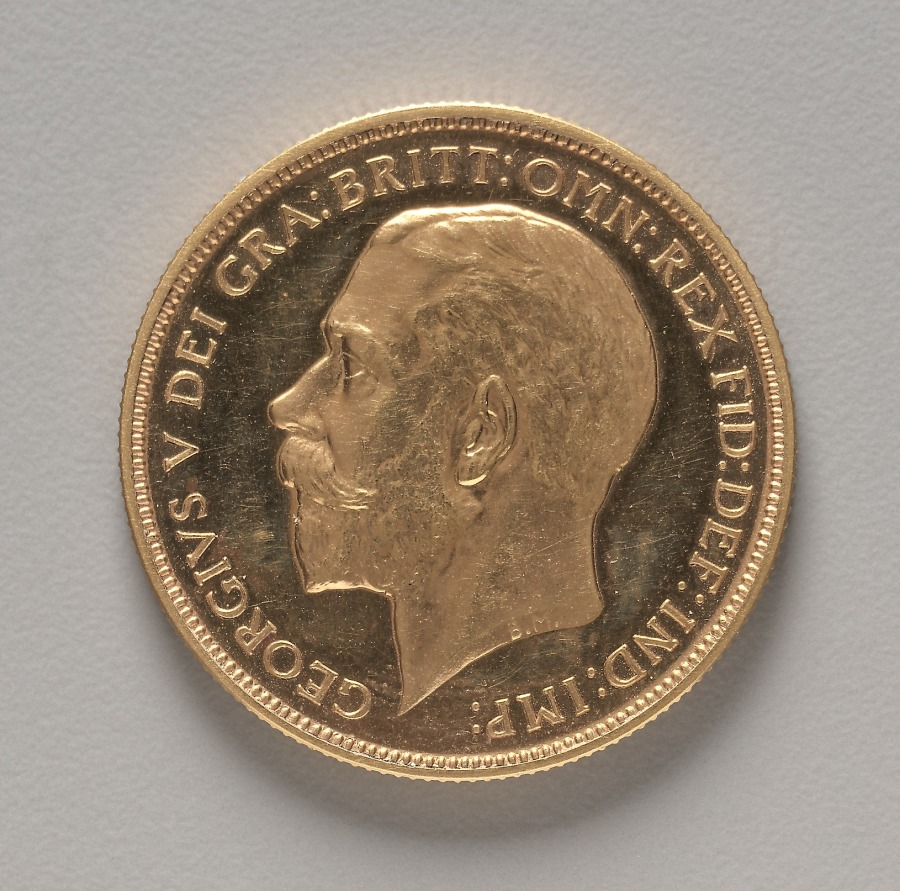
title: Two Pound Piece: George V (obverse); St. George and the Dragon (reverse)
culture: England, George V, 1910-1936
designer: Bertram Mackennal (Australian, 1863–1931)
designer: after Benedetto Pistrucci (Italian, 1784–1855)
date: 1911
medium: gold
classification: Coins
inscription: GEORGIVS V DEI GRA: BRITT: OMN: REX FID: DEF: IND: IMP:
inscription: 1911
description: Benedetto Pistrucci, an Italian gem and coin engraver, is best known for his image of St. George and the Dragon, which is still used on coinage today. Bertram Mackennal, an Australian sculptor and medallist, was reported to be one of the few artists King George V liked and is most famous for designing the king's likeness.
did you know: This piece was struck for inclusion in poof sets, never for circulation.